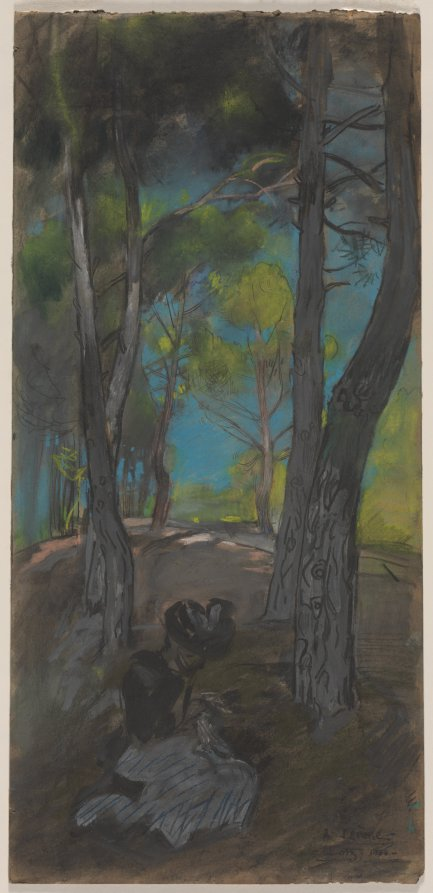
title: Lotz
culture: France, 20th century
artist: Auguste Louis Lepère (French, 1849–1918)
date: 1900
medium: pastel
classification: Drawing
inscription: inscribed in black pastel, lower right: "Lepère / Lotz 1900"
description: Although celebrated as the leader of the creative revival of wood engraving in late 19th-century France, Lepère was also a painter who used pastel to make studies directly from nature. This study of a woman sewing is inscribed to the artist’s friend, Lotz-Brissonneau, who in 1905 authored the catalogue raisonné of Lepère’s graphic work.